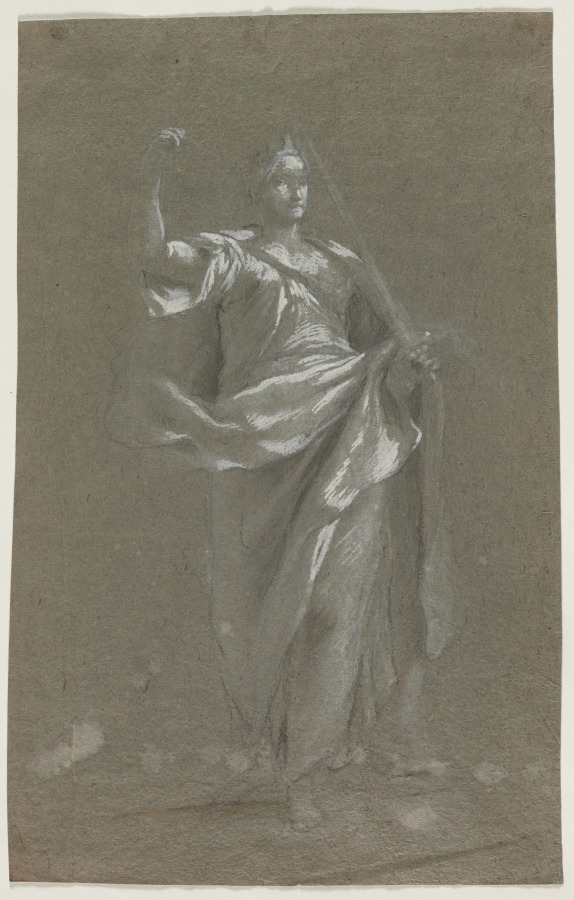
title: Allegorical Figure (recto and verso)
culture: Italy, style of 17th century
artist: Anonymous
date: 1800s?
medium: black chalk and brush and brown and gray wash heightened with white and gray gouache, with traces of stylus and white chalk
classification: Drawing